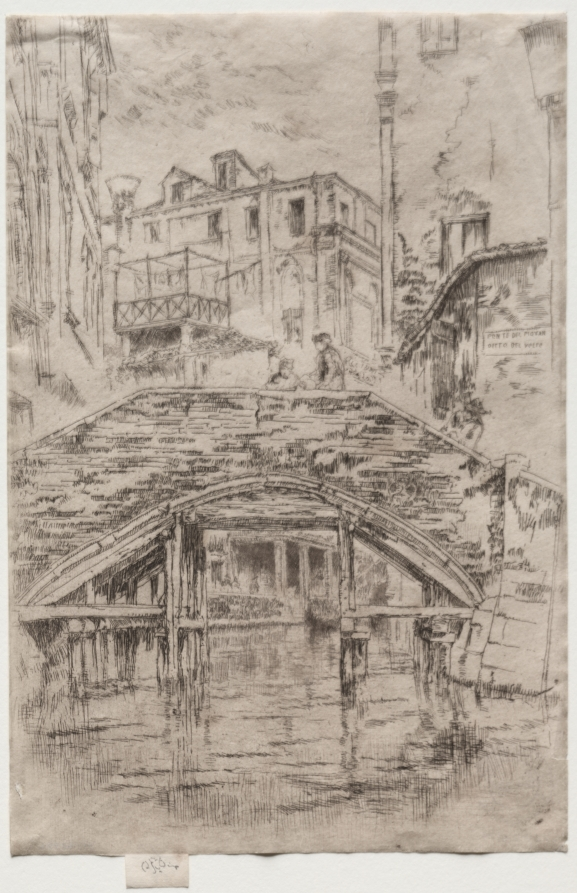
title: Ponte del Piovan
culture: America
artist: James McNeill Whistler (American, 1834–1903)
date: 1886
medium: etching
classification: Print